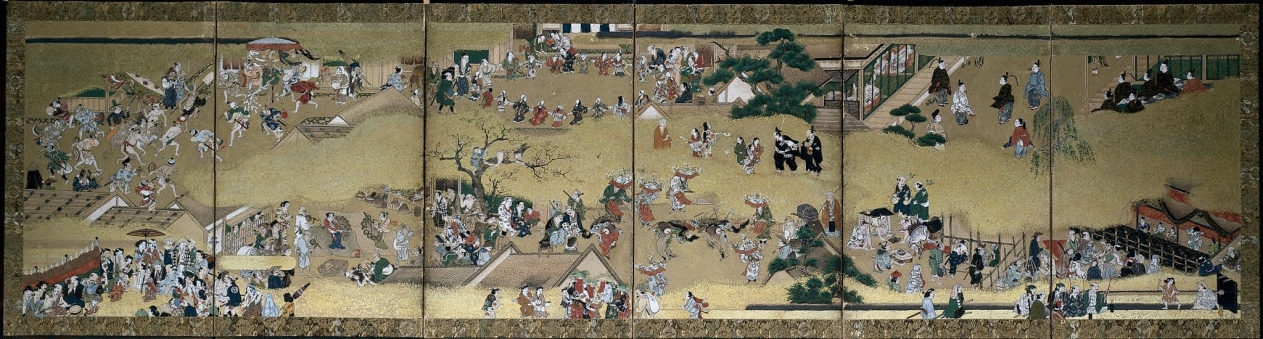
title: Festival Scenes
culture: Japan, Edo period (1615–1868)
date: 1600s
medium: One of a pair of six-panel folding screens; ink, color, gold, and gold leaf on paper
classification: Painting